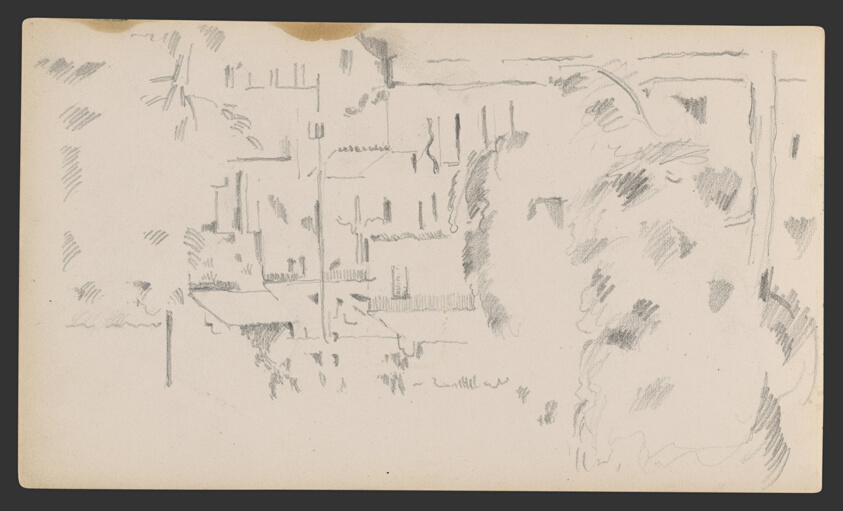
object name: Drawing and Watercolor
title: Sketchbook No. 2 (L'Estaque)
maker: Paul Cézanne; French, 1839-1906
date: 1875–86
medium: Graphite and pen and ink drawings on paper, bound into a book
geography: France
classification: sketchbook; graphite; prints and drawing; paper